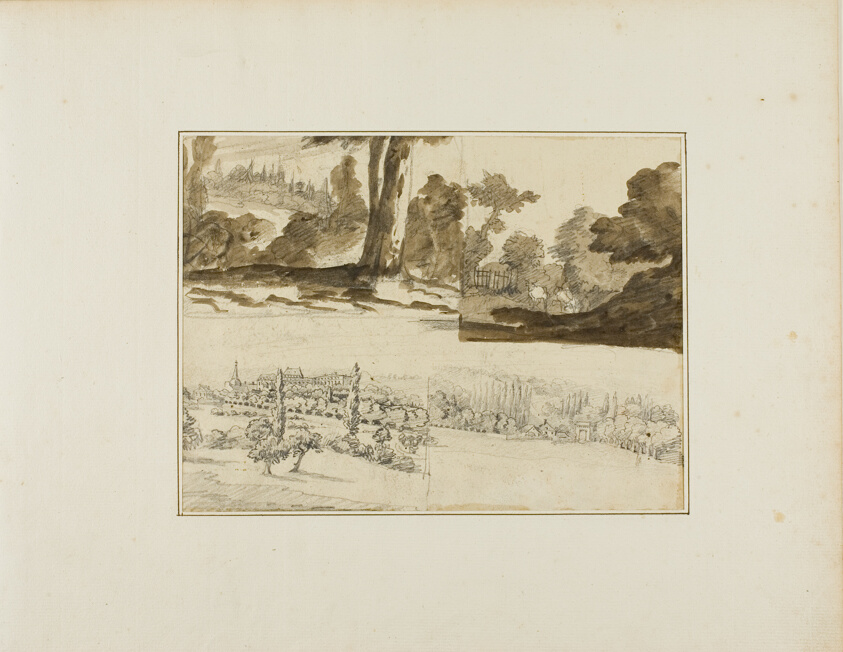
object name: Drawing and Watercolor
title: Four Landscapes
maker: Jean Louis André Théodore Géricault (French, 1791-1824)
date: 1813/14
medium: Graphite and brush and brown wash, on cream wove paper, perimeter mounted on ivory laid paper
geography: France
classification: graphite; drawings (visual works); prints and drawing